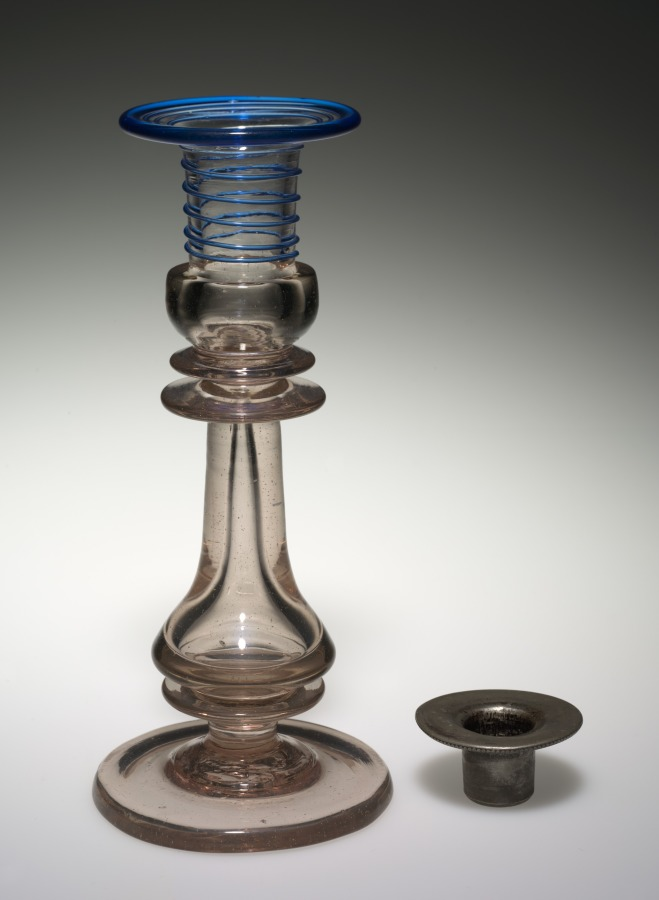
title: Candlestick and Bobeche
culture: America, Pennsylvania, Pittsburgh ?, mid-19th century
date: mid-1800s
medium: glass and detachable pewter bobeche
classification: Glass